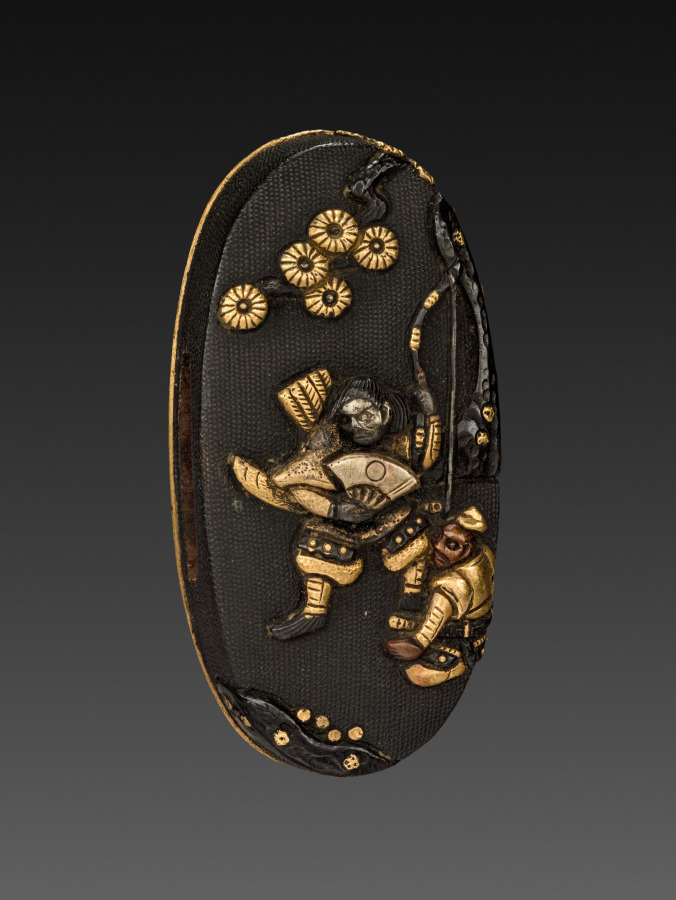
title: Sword-Hilt Pommel (Kashira)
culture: Japan, Edo period (1615–1868)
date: 1700–1850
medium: shakudo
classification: Arms and Armor